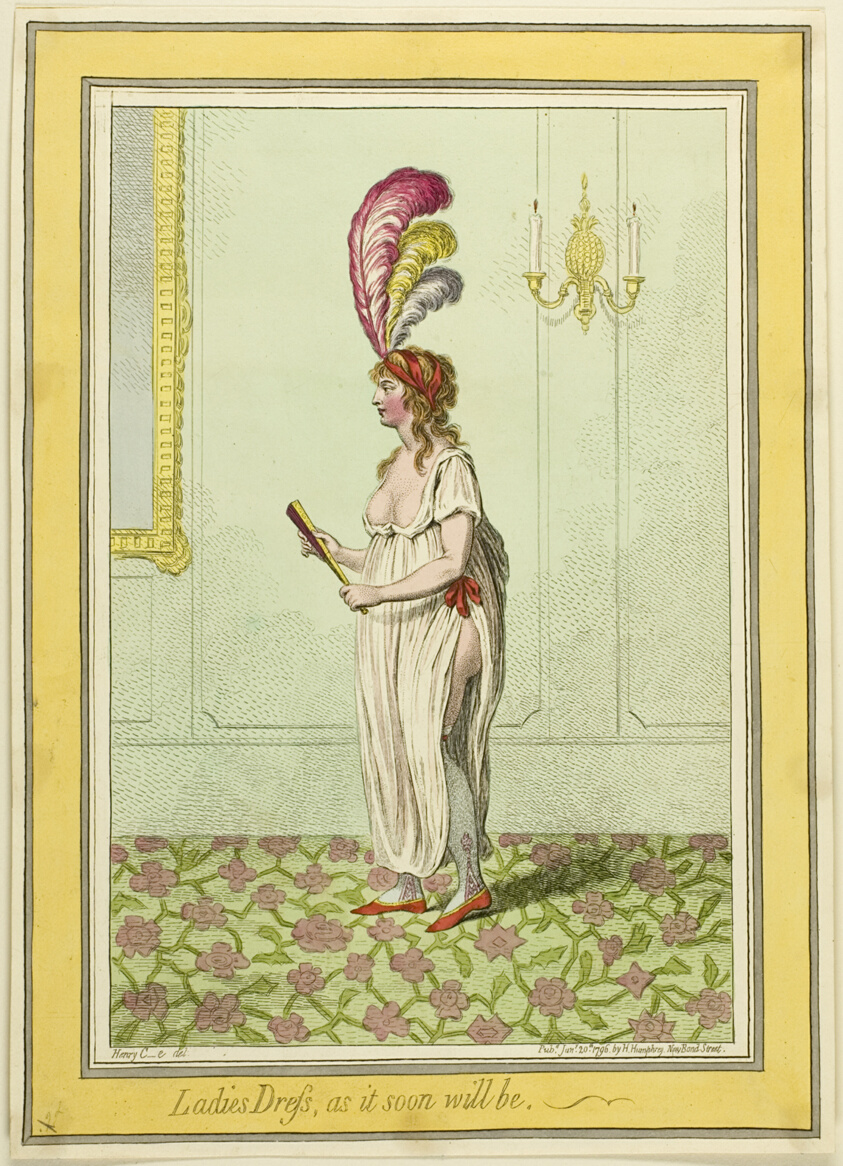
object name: Print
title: Ladies Dress, As it Soon Will Be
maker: James Gillray (English, 1756-1815); published by Hannah Humphrey (English, c. 1745-1818)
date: published June 20, 1796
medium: Etching in black ink and watercolor on cream wove paper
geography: England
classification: etching; print; prints and drawing